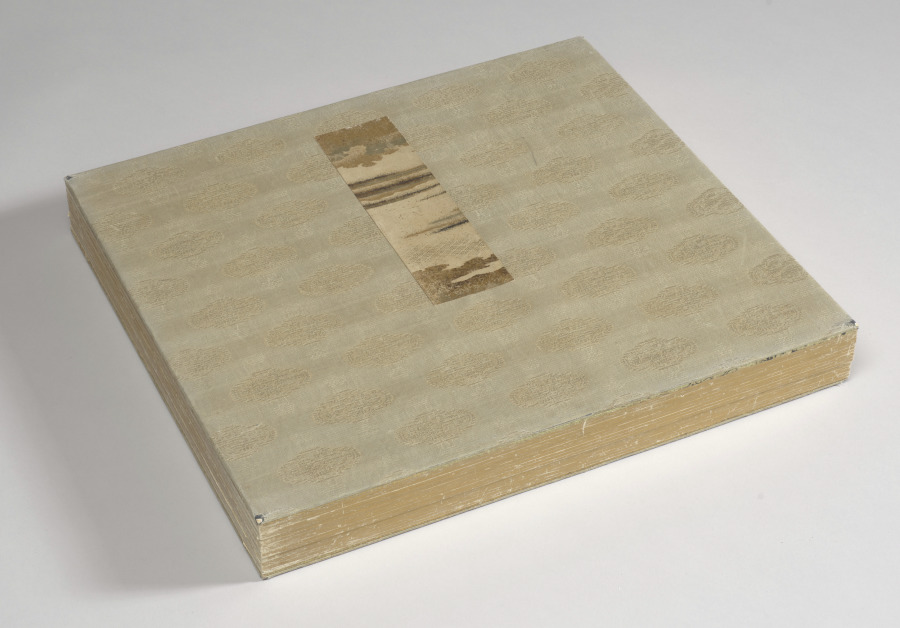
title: Album of Textile Samples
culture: China, Tang dynasty (618–907) or Japan, Nara period (710–794)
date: 700s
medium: silk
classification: Textile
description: The album contains an important collection of early East Asian textiles. There are fifty-five fragments in the album representing forty-five different textiles. The fragments vary in size from the smallest, about an inch square, to the largest, which is fifteen inches square. With three exceptions, the pieces are of silk. The techniques represented include plain cloth and gauzes, either monochrome or with printed decoration, and damask-like weaves with a ground in plain cloth and a pattern in twill and one example with the ground in weft twill and the pattern in warp twill. The compound weaves include one example of a compound warp-face cloth, a technique that had all but died out after Han times, and a number of compound twills with a variety of elaborate decorative motifs, which are among the most important and interesting in the collection. There are one embroidery and one fragment of silk tapestry.